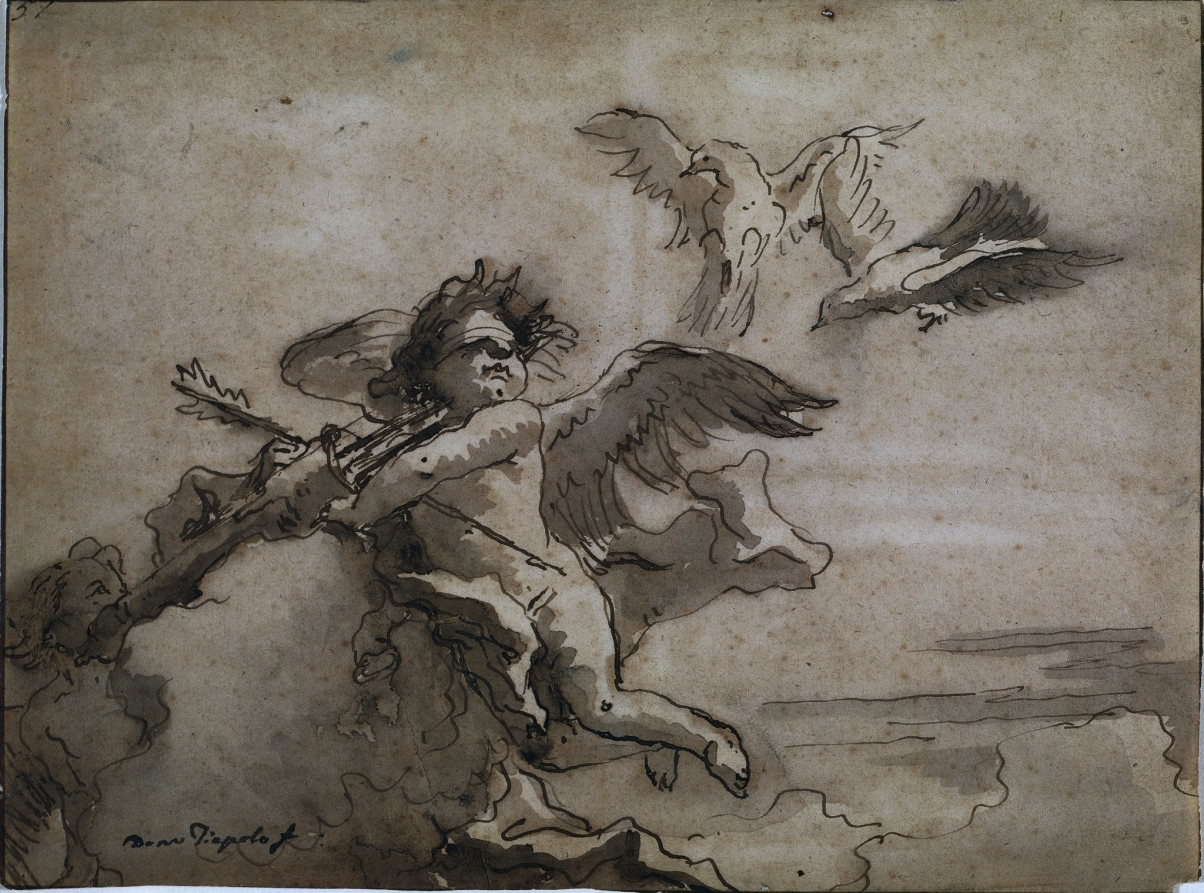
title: Cupid Blindfolded and Two Doves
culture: Italy, 18th century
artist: Giovanni Domenico Tiepolo (Italian, 1727–1804)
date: 1757 or after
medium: pen and brown ink and brush and brown wash; framing lines in brown ink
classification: Drawing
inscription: signed, lower left, in brown ink: Dom Tiepolo f ; upper left, in brown ink: 57 ; VERSO, center left, in brown ink: 265 [sideways] ; upper left, in blue pencil: 39. #7 ; upper right, in blue pencil: 100ºº ; center, in graphite: 15 [5 is crossed out] ; center right, in graphite: [illegible]